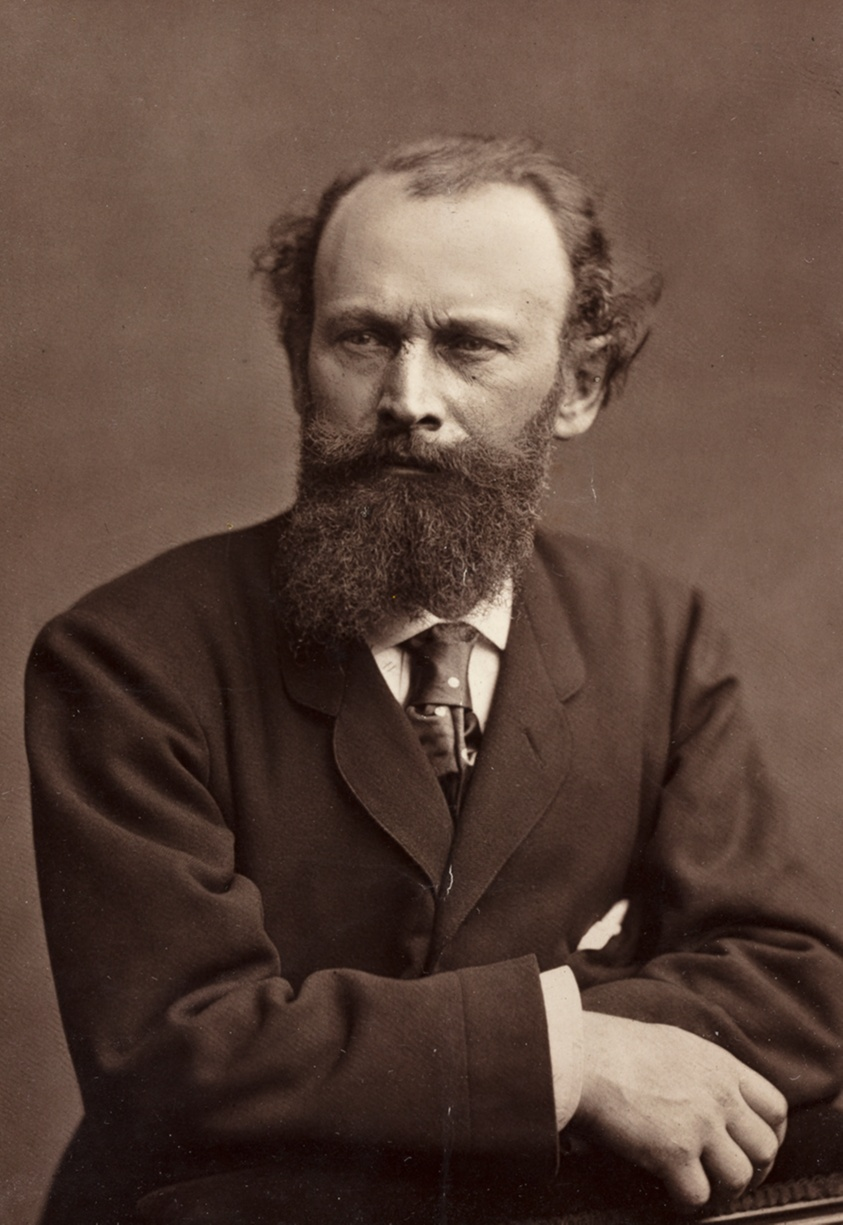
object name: Photograph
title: Édouard Manet (French painter, 1832-1883)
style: 19th century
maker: Nadar (Gaspard Félix Tournachon) (French, 1820–1910)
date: 1865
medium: Woodburytype, from the periodical “Galerie Contemporaine Littéraire, Artistique” (1876), volume 1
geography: France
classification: woodburytype; photomechanical process; photography; photograph